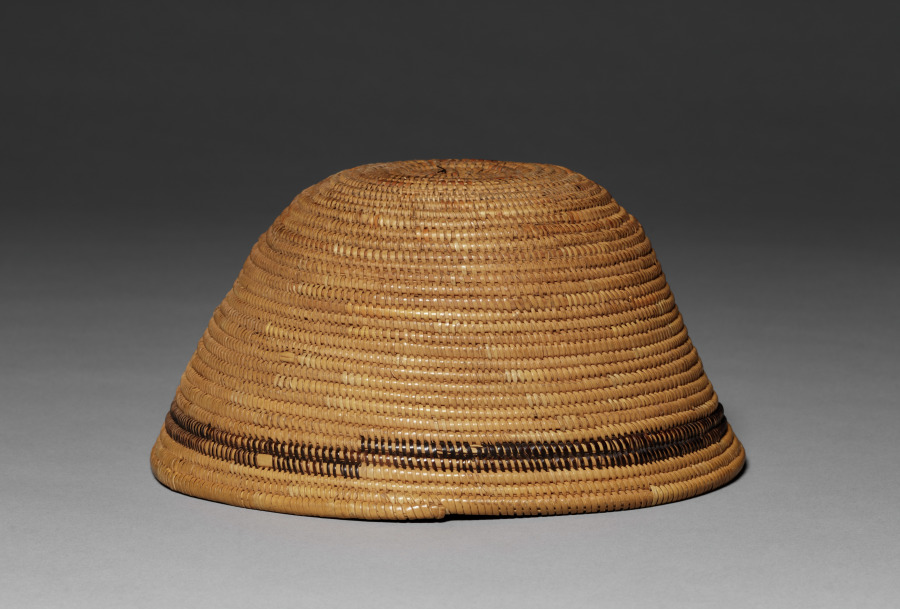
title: Hat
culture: California, Southern, Late 19th- Early 20th century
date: c 1875– 1925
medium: Juncus, Sumac; Coiled; Deergrass foundation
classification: Basketry